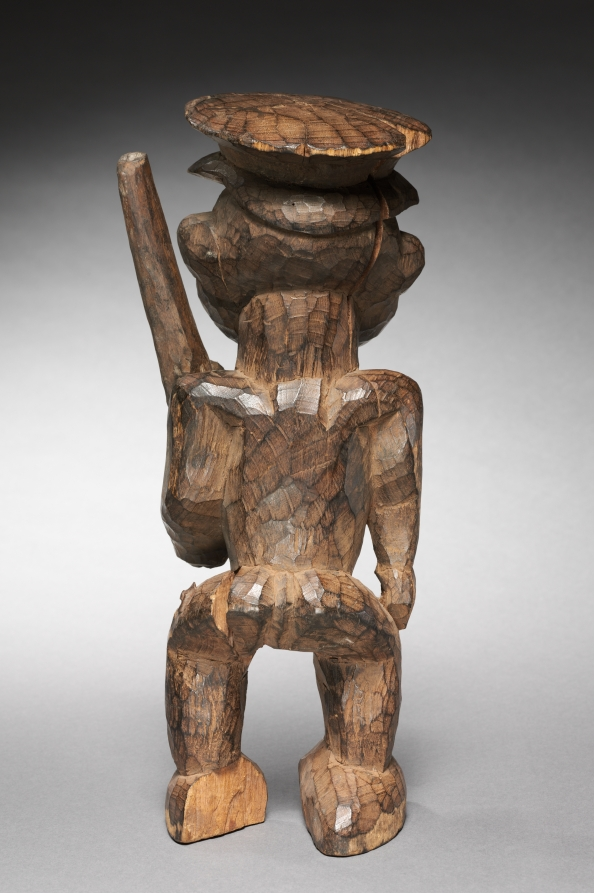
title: Male Figure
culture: Africa, Central Africa, Cameroon, Grassfields region, unidentified maker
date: c. 1905–10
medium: wood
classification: Sculpture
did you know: The weapon this figure holds is a later replacement added in Ohio.